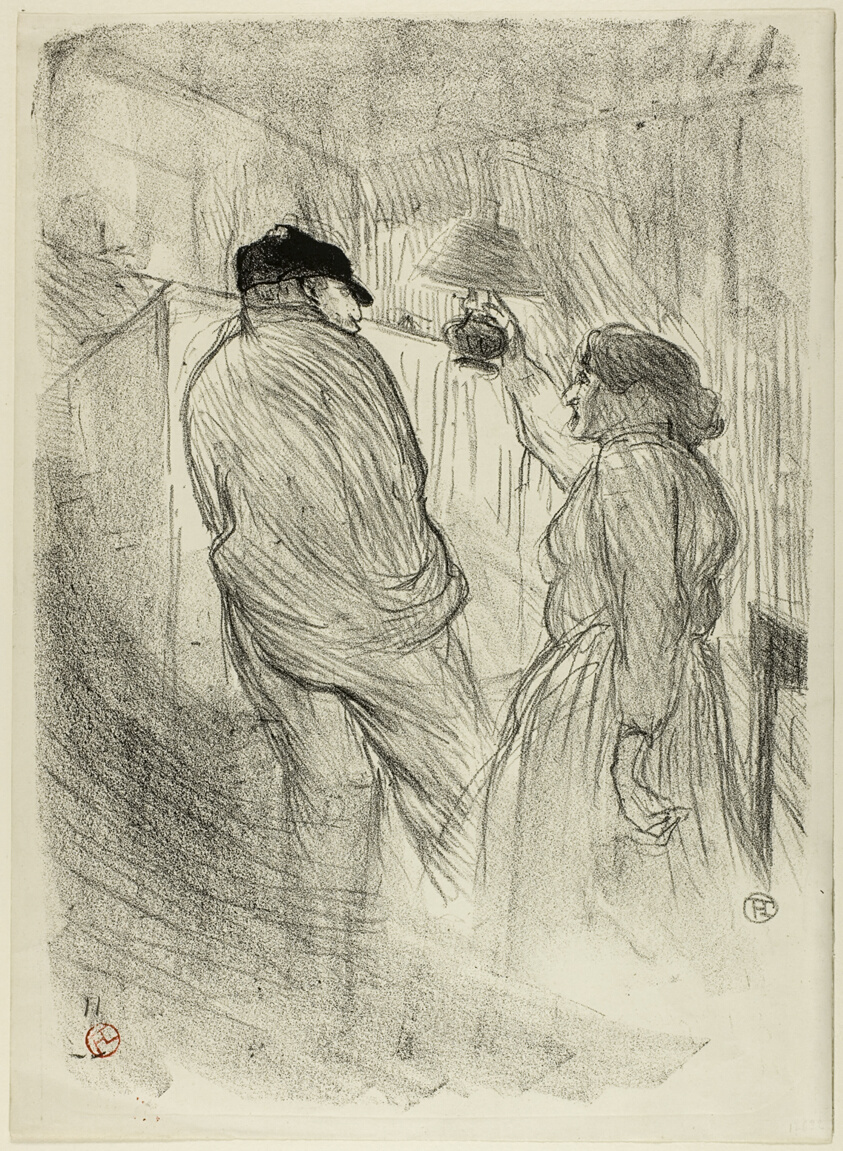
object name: Print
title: At the Théâtre-Libre: Antoine in L'Inquiétude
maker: Henri de Toulouse-Lautrec (French, 1864-1901)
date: 1893, published 1894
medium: Lithograph on cream wove paper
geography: France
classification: lithograph; print; prints and drawing